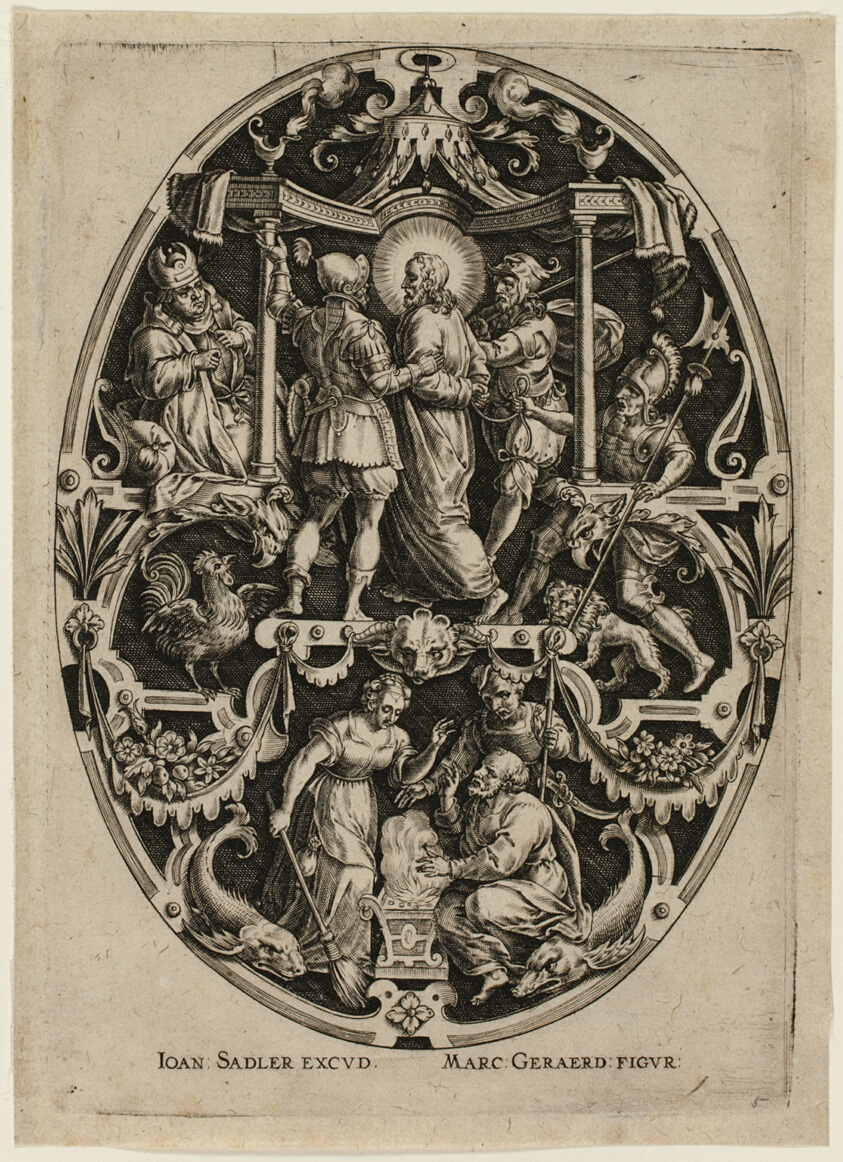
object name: Print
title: Arrest of Christ, from Passion of Christ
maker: Jan Sadeler, the Elder (Flemish, 1550-1600); after Marcus Gheeraerts, the Elder (Flemish, c. 1520-c. 1590)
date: 1575/1600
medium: Engraving in black on cream laid paper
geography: Flanders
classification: engraving; print; prints and drawing